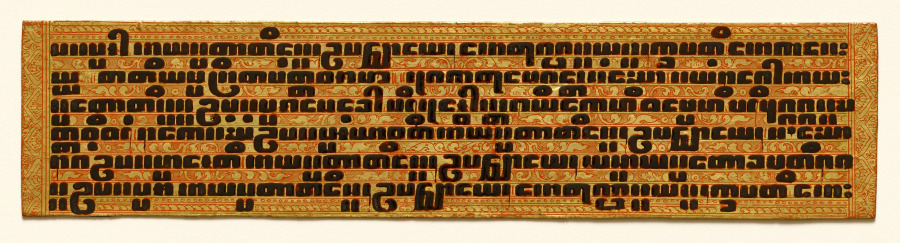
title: Text, folio 5 (recto) from a Kammavacha: Buddhist ordination text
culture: Myanmar (Burma)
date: 1800s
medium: Leaf: lacquer and gilding on cloth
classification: Manuscript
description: In premodern Burma, lay people commissioned lavishly ornamented manuscripts for ceremonial occasions, when officiants would read aloud from the text. Written in black lacquer, the text is in the language of Pali written in a Burmese script. It contains ordination rites and procedures for monastic ceremonies. The second to last page is covered with intricately drawn, winged celestial beings (nats) in gestures of praise. They fly amid intertwining vegetation—denoting bounty—that grows from serpentine forms that refer to rain clouds. Lionlike forms inhabit the space with them. The top and bottom covers are equally ornamented with jeweled floral patterning.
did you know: The Pali text of this manuscript is written in Burmese square script, which is also known as "tamarind seed script."